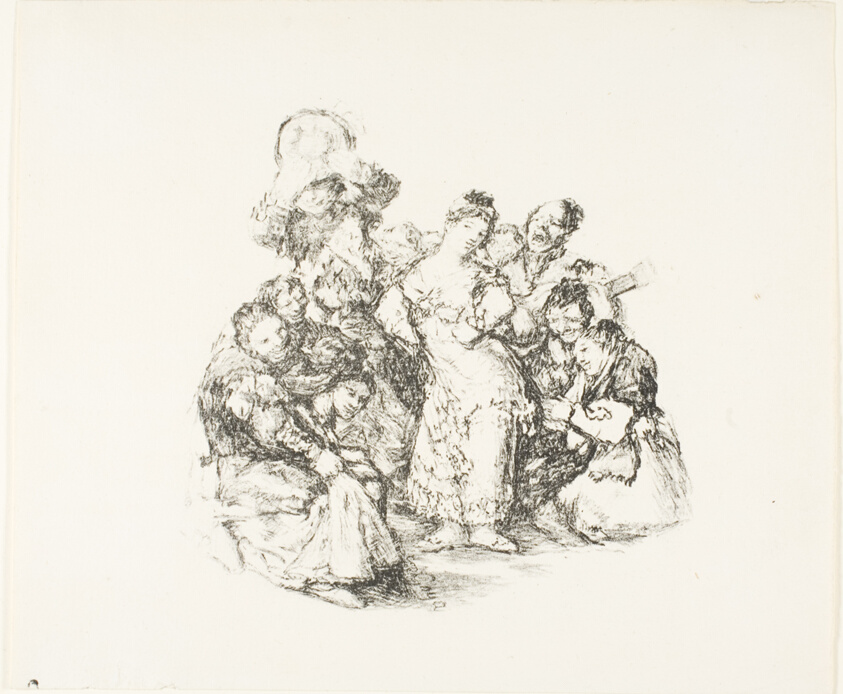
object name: Print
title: The Andalusian dance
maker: Formerly attributed to Francisco José de Goya y Lucientes; Spanish, 1746-1828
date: 1825/26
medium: Lithographic crayon on ivory laid paper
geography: Spain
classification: lithograph; print; prints and drawing